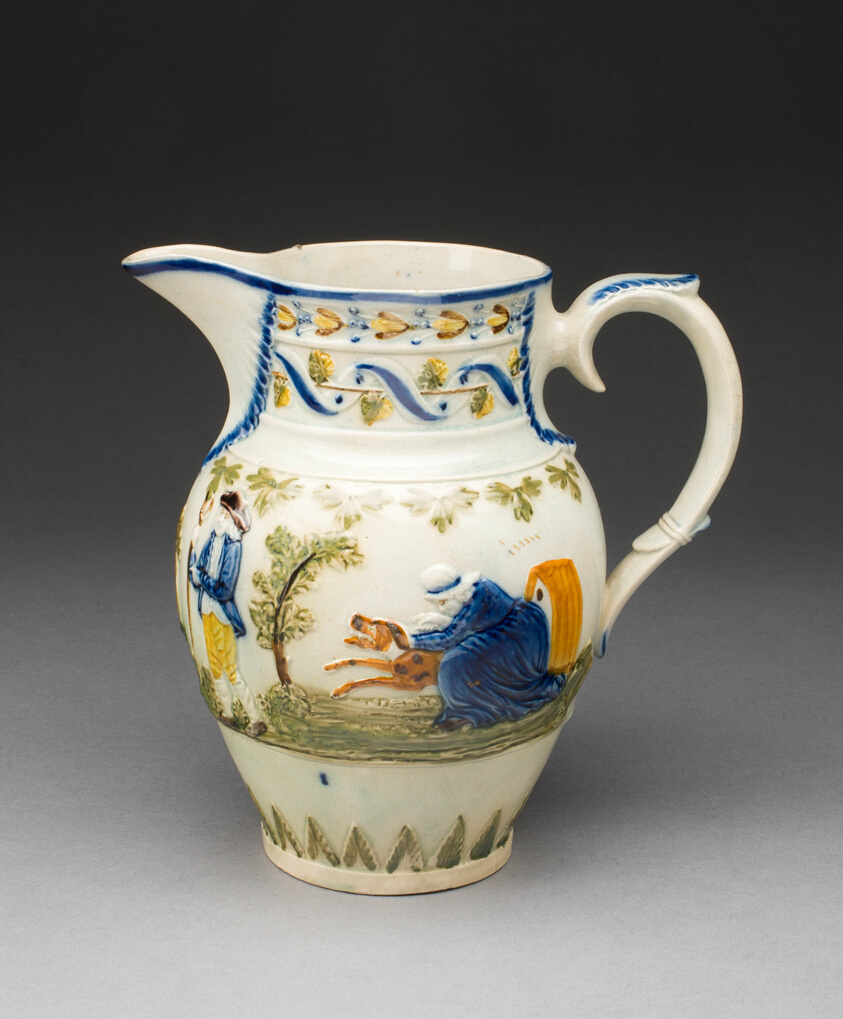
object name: Ceramics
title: "The Fox and the Grey Goose" Nursery Rhyme Jug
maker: England, Staffordshire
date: c. 1800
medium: Lead-glazed earthenware (prattware)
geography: Staffordshire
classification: earthenware; european decorative arts; ceramics; lead-glazed earthenware